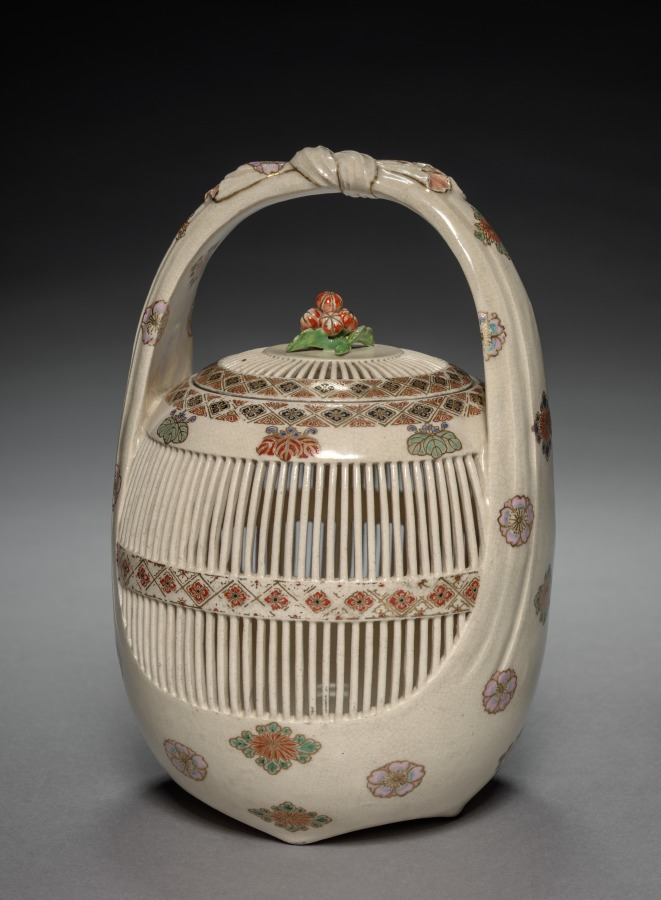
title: Jar: Satsuma Ware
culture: Japan, Edo period (1615–1868)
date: early to mid-1800s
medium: pottery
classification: Ceramic